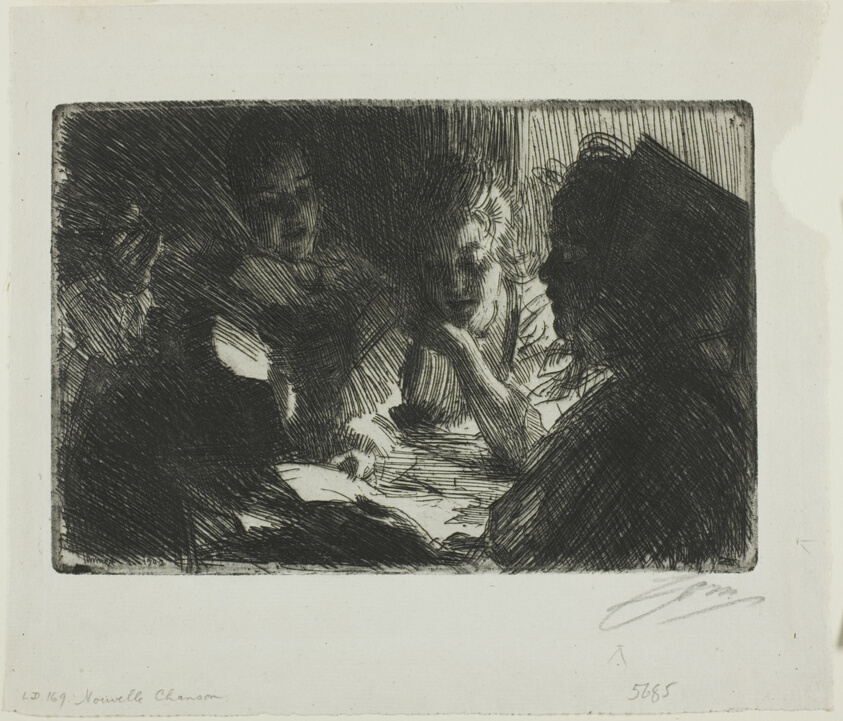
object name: Print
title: The New Ballad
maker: Anders Zorn (Swedish, 1860-1920)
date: 1903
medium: Etching on ivory laid paper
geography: Sweden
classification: etching; print; prints and drawing